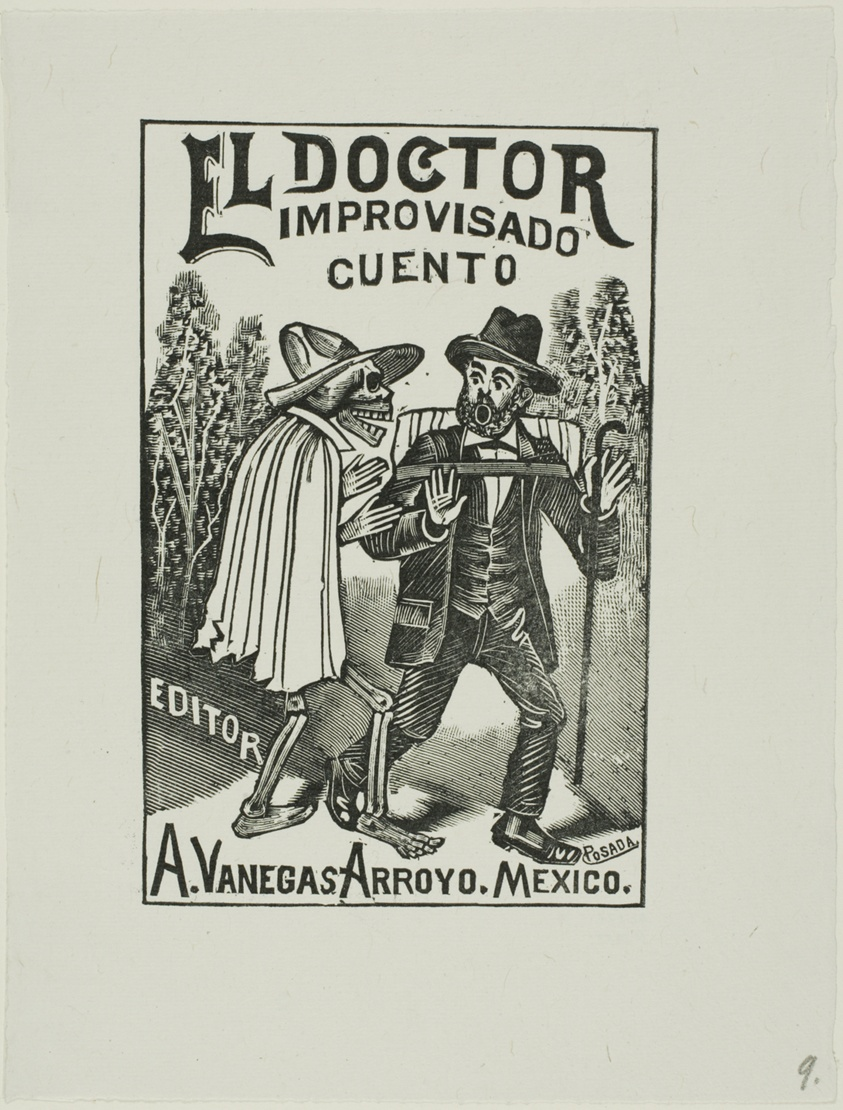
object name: Print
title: The Impromptu Doctor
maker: José Guadalupe Posada (Mexican, 1852-1913)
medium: Relief engraving on typemetal on paper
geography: Mexico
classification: relief etching; print; prints and drawing